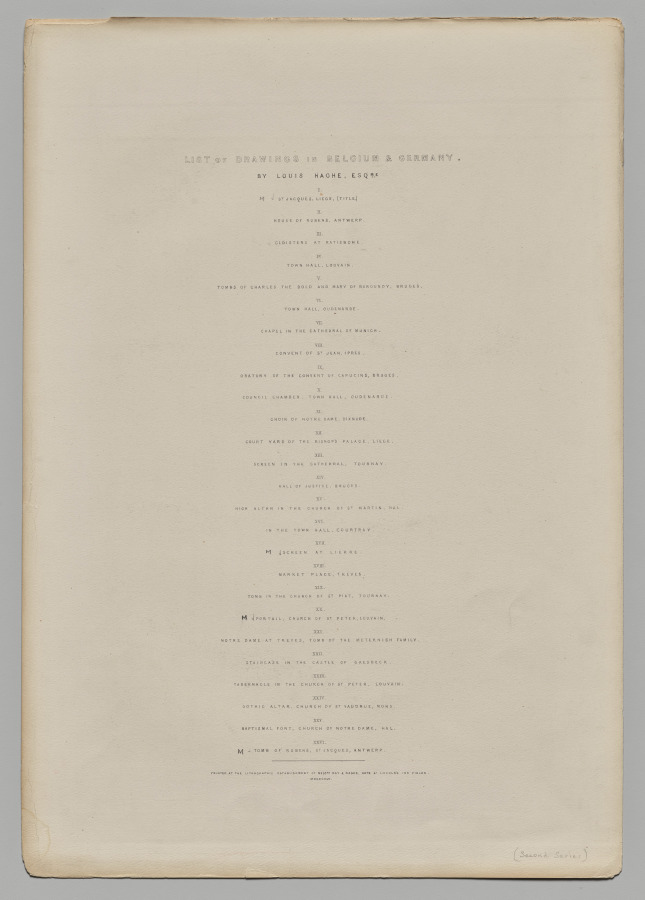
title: Sketches in Belgium and Germany, Second Series: No. 1 - Title Page - St. Jacques, Liege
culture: England, 19th century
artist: Louis Haghe (British, 1806–1885)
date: 1845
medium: lithograph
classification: Print